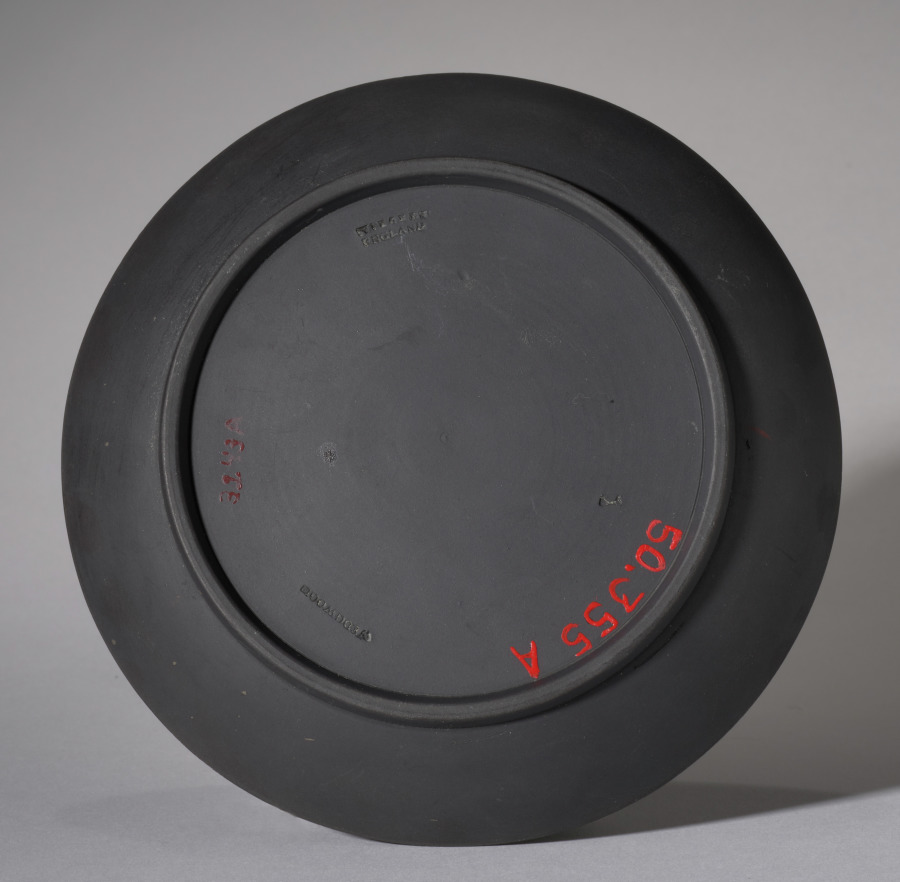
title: Saucer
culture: England, Staffordshire, 19th century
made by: Wedgwood Factory (British)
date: 1800s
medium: black basalt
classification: Ceramic